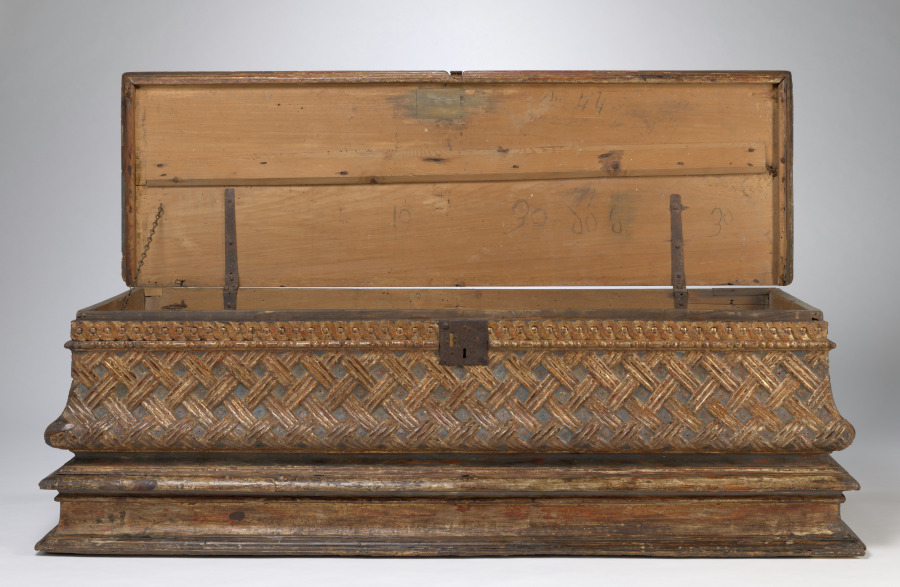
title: Cassone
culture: Italy, early 16th century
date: early 1500s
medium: walnut, painted and gilded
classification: Furniture and woodwork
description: Chests such as this were made in pairs and presented to young women on the occasion of their marriage. They not only provided storage space in the home for clothing and personal effects, but could also be used as a bench to sit on. It was not uncommon for any one room in a Renaissance palace to have several. This chest was in Savoy Castle, near Verzuolo, in the Piedmont region of northern Italy from the 1500s until 1922..